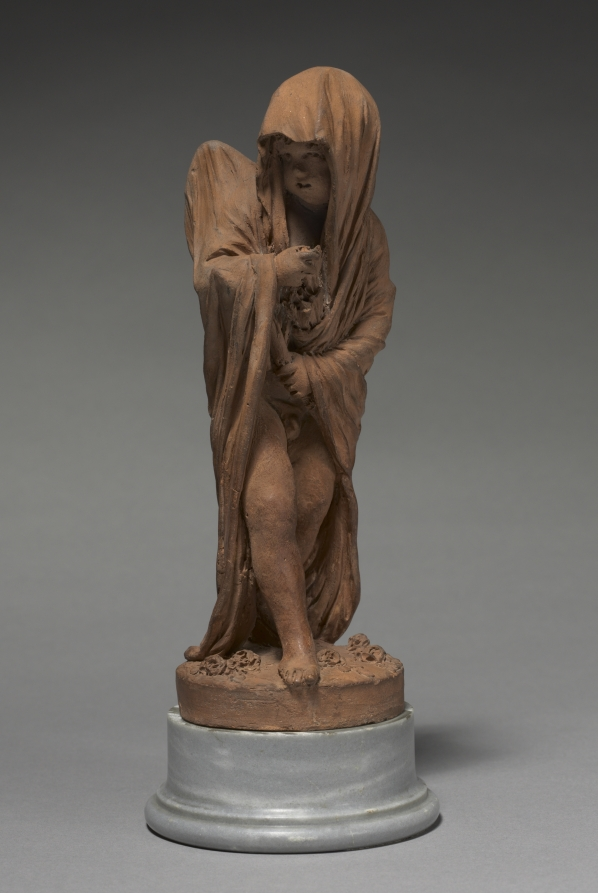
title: Cupid Secretly Drawing an Arrow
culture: Belgium, Brussels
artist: Gilles-Lambert Godecharle (Belgian, 1750–1835)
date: 1807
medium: terracotta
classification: Sculpture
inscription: inscribed on the edge of the base at right: "Godecharle" and "1807."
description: This clay model is a maquette for a sculpture in limestone more than three feet tall, entitled Cupid Disguised, Hiding Under a Veil. The motif is borrowed from the Marlborough cameo (an ancient Roman cameo now at the Museum of Fine Arts, Boston, inv. no. 99.101) that was a source of inspiration for neoclassical artists. The gem illustrates the wedding of Cupid and Psyche—shown as veiled children with protruding wings—from which Godecharle extracted the single figure of Cupid and, instead, depicted him in ambush.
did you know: Cupid traipses daintily on rose blossoms, ready to shoot his love-filled arrow at an unsuspecting victim.